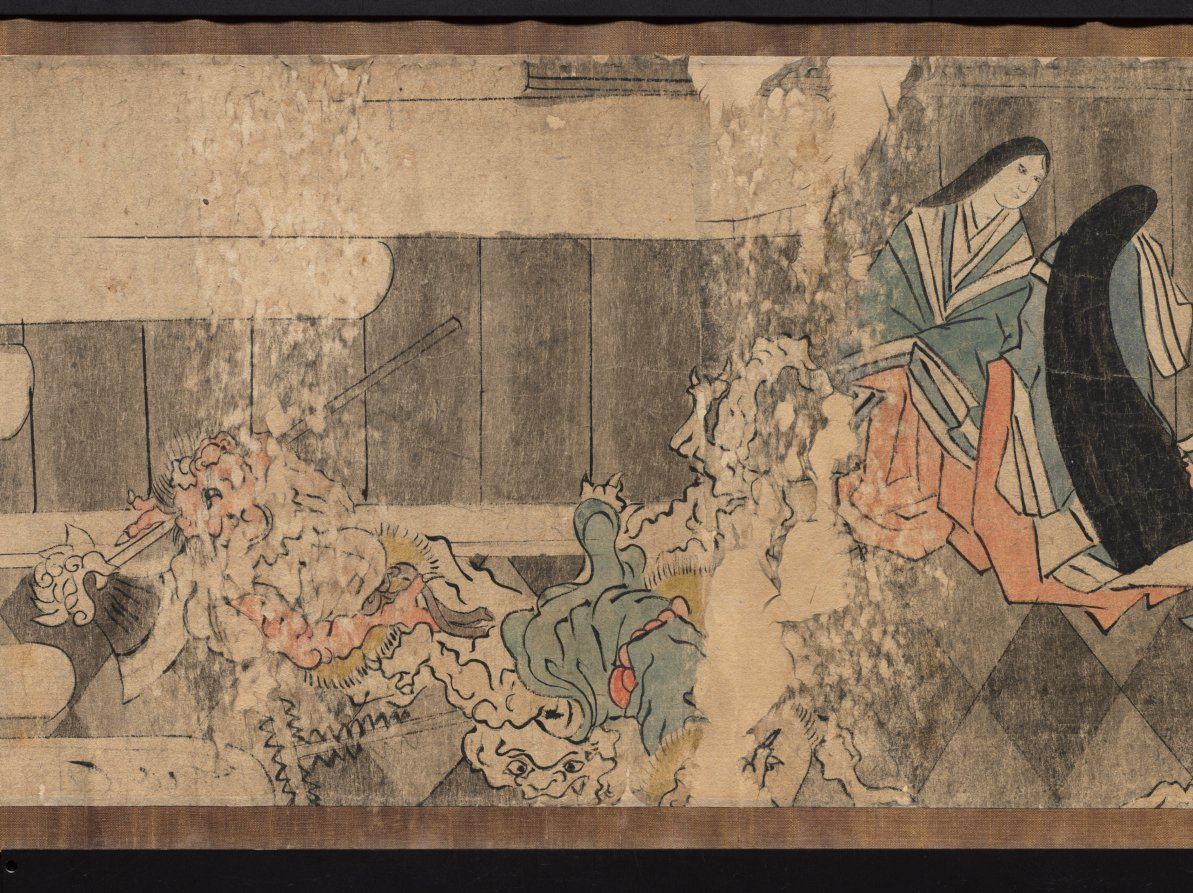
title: Oeyama Engi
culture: Japan, Edo period (1615–1868)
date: 1615–1868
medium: one of a pair of handscrolls; ink and color on paper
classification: Painting